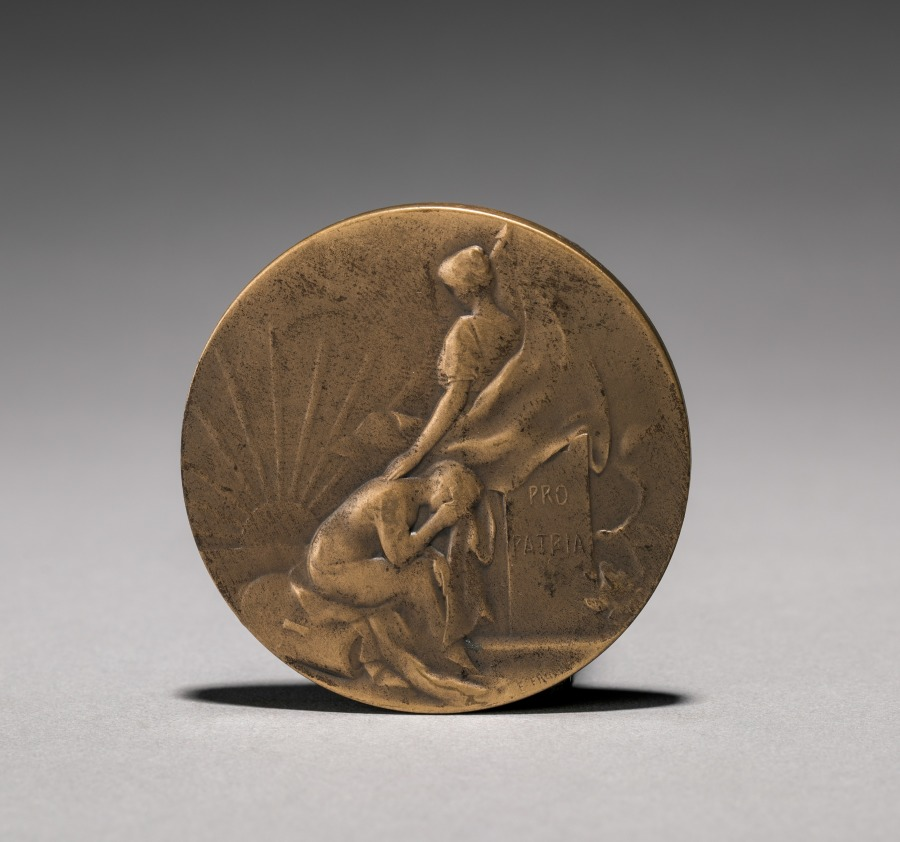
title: Medallion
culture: France, 20th century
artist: Edouard Fraisse (French, 1880–1945)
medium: bronze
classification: Metalwork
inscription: "Pro Patria" (for the fatherland); signed: "E. Fraisse."